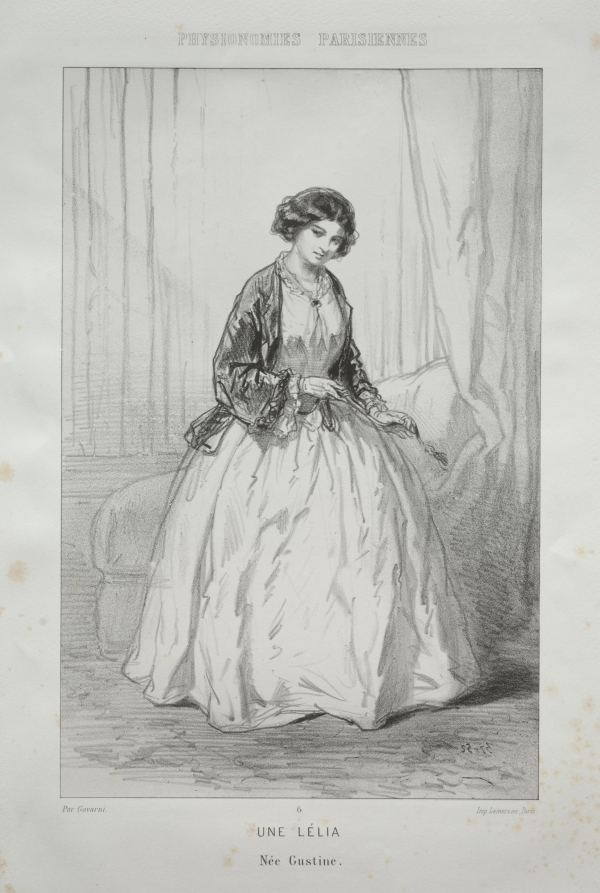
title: Une Lélia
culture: France, 19th century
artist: Paul Gavarni (French, 1804–1866)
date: c. 1857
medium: lithograph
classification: Print